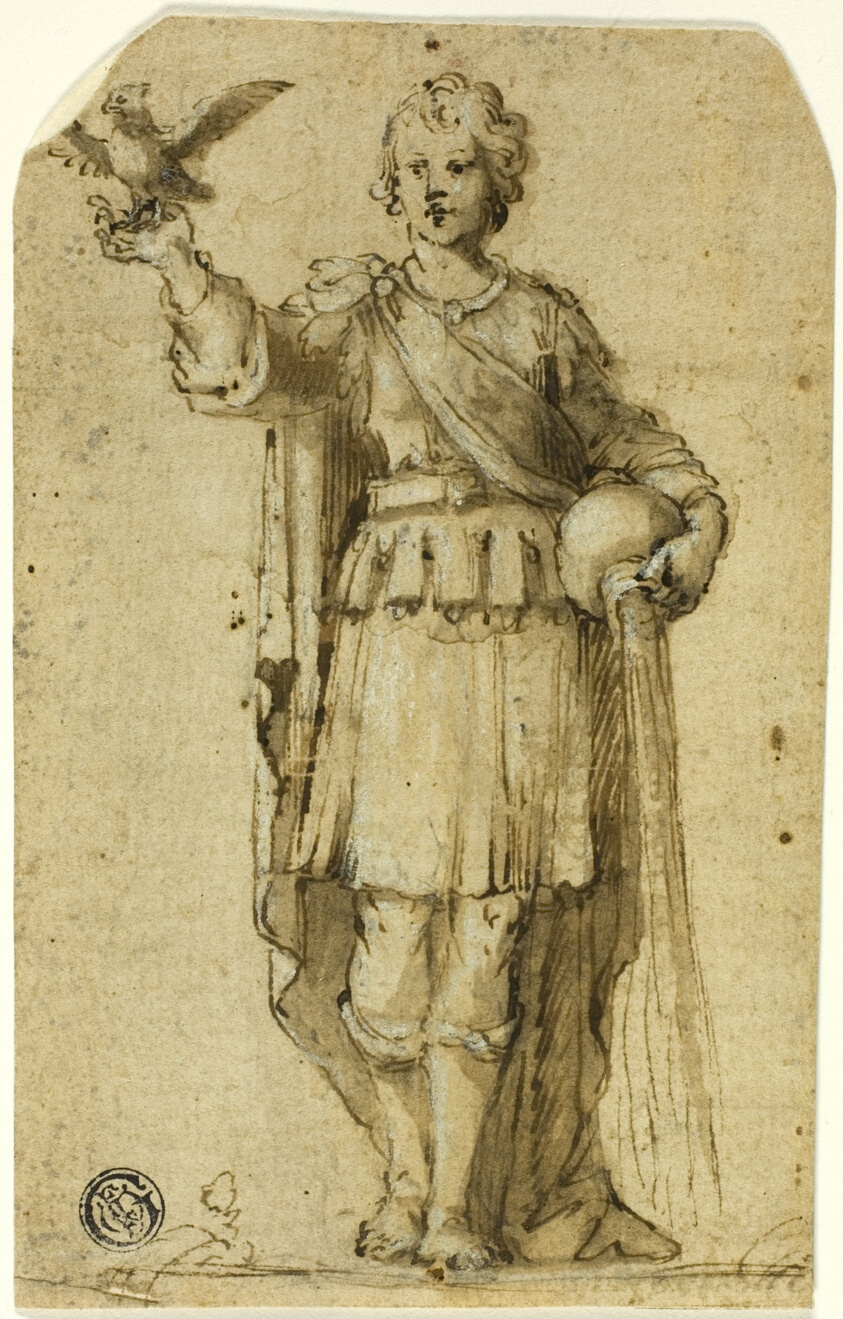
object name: Drawing and Watercolor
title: Saint Florian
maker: Attributed to Alessandro Turchi, called L'Orbetto; Italian, 1578-1649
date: 1600/10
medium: Pen and brown ink with brush and brown wash, heightened with lead white (partly oxidized), on tan laid paper, laid down on ivory laid paper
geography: Italy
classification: ink with wash; drawings (visual works); prints and drawing